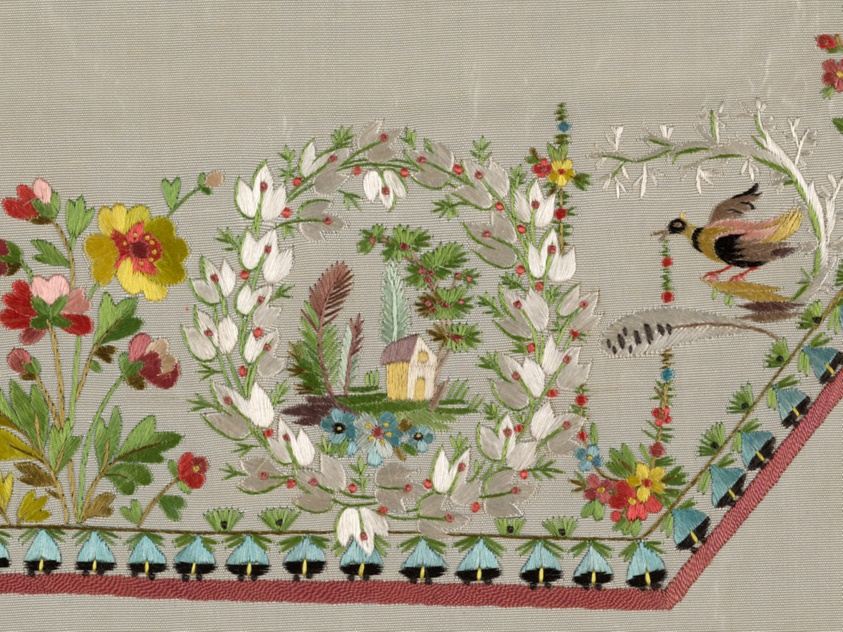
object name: Costume and Accessories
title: Embroidered Fabric for a Man's Waistcoat Front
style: 18th Century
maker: France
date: 1780s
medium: Silk, plain weave; embroidered with silk thread in individual back, outline, running, satin, split and stem stitches; couching; laid work and French knots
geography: France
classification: costume; needlework (visual works); waistcoat (garment); textile; costume - embroidery; needlework - costume; garment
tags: floral motifs, flowers, foliage, white (color), green (color), pink (color), building, floral, bird, wreaths, feathers, fashion, houses